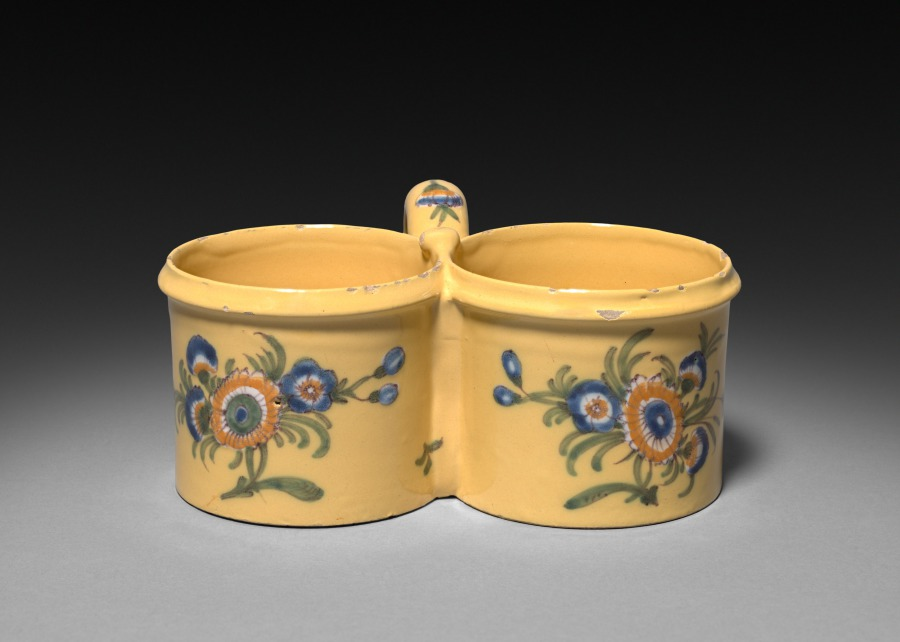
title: Cruet Stand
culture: Southern France, late 18th - early 19th century ?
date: c. 1790 – 1810 ?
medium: faience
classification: Ceramic